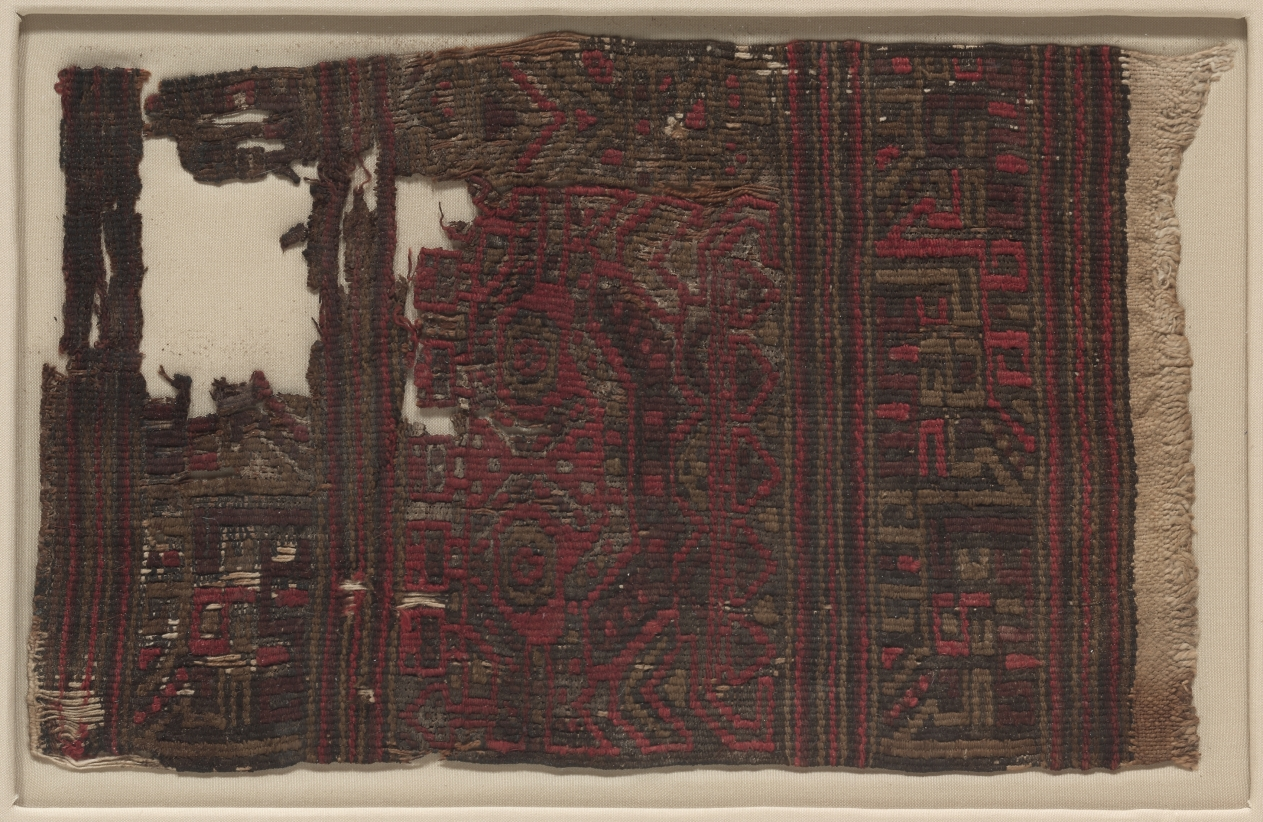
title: Panel from the End of a Sash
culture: Peru, South Coast, Paracas, Carhua or Chucho?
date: 700–1 BCE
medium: cotton; camelid fiber; tapestry and plain-weave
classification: Textile